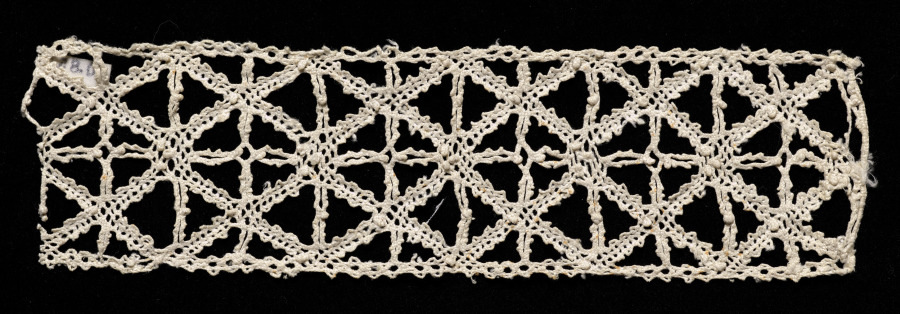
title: Lace Insertion (no selvage)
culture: Italy, Venice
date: 1540–60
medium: Bobbin lace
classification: Lace